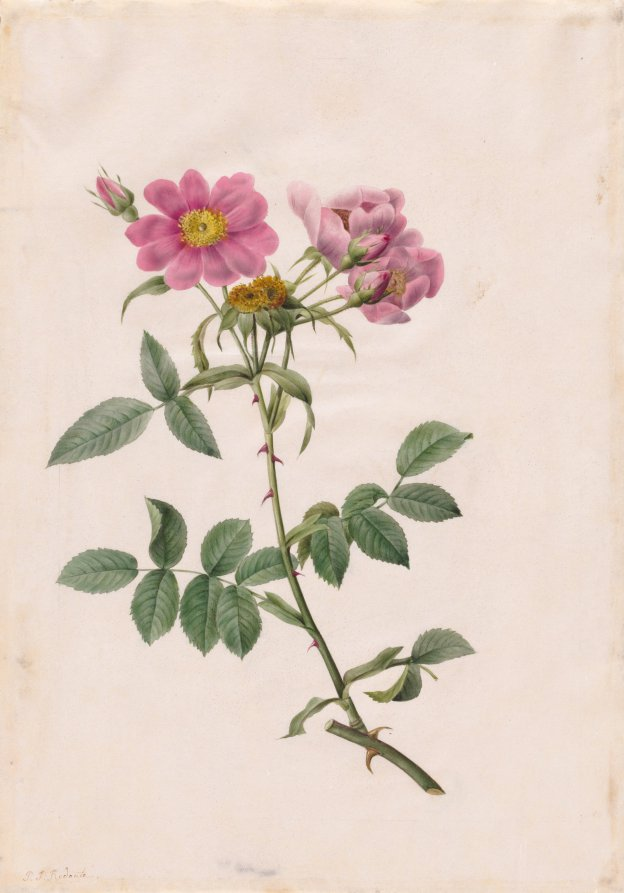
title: Rosa Collina Monsoniana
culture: France, 19th century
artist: Henri Joseph Redouté (French, 1766–1853)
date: 1817–1824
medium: watercolor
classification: Drawing